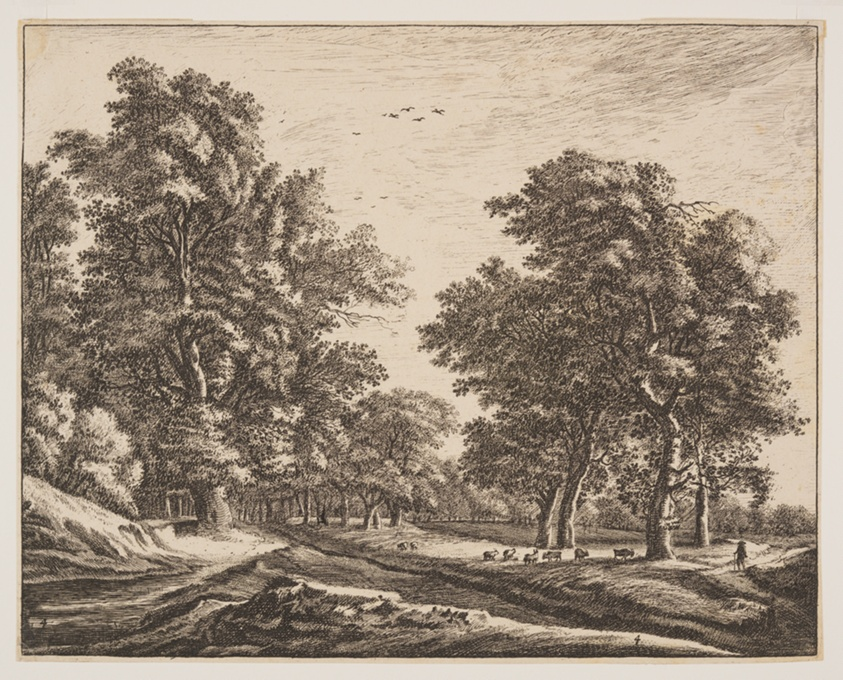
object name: Print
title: No. 4, from Six Views in the Wood of The Hague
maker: Roelant Roghman (Dutch, c. 1627–1692)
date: c. 1640-52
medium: Etching and stipple on ivory laid paper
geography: Netherlands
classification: print; paper; prints and drawing; etching